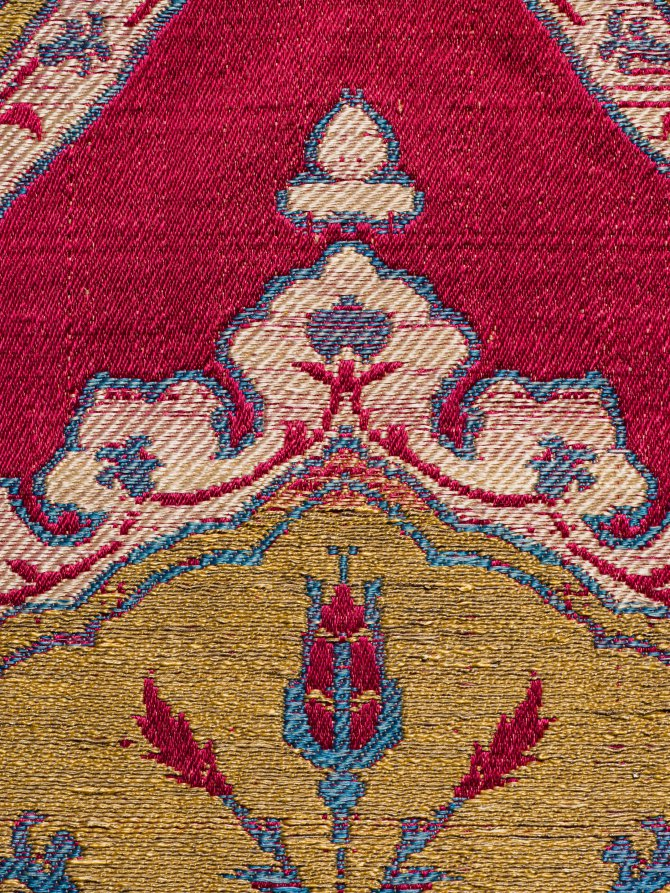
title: Lampas with floral medallions in ogival lattice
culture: Turkey, Istanbul or Bursa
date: 1550–75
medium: Silk and gilt-metal thread; lampas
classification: Textile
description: This signature Turkish brocaded silk has a classic elegance associated with the artistic height of the 1500s. The prominent golden medallions and ogival (curved) lattice contrast with exceptionally delicate Turkish flowers—tulips, roses, carnations, and hyacinths—which all grow on a single vine. The symmetrical design and two complete medallions with lattices across the width are typical Turkish features of fine brocaded silks. Its original function is uncertain. Possibly it was intended for an imperial kaftan, a garment consisting of a long gown with sleeves reaching below the hands, examples of which are preserved in the Topkapi Palace in Istanbul, the imperial center of the vast and wealthy Ottoman Empire.